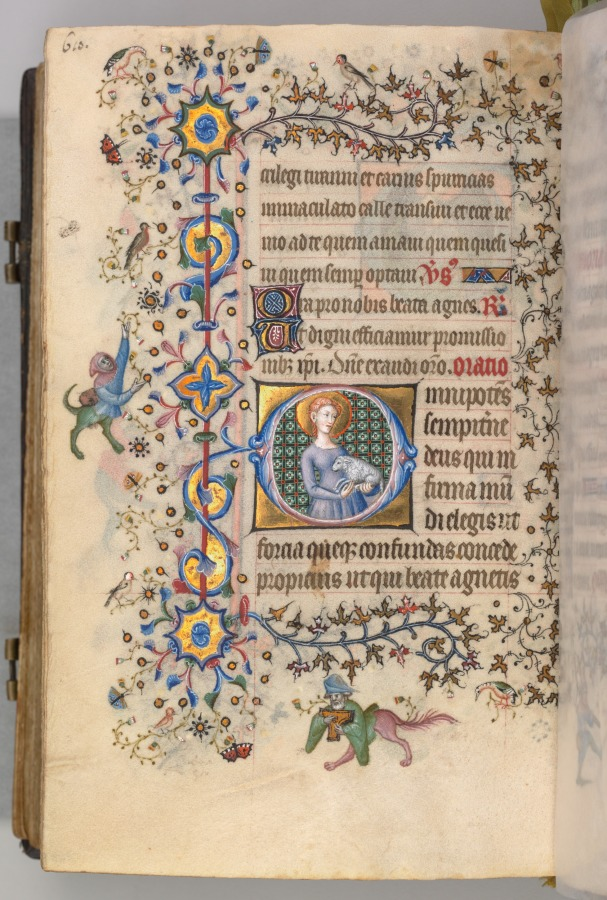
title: Hours of Charles the Noble, King of Navarre (1361-1425): fol. 299v, St. Agnes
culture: France, Paris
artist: Master of the Brussels Initials and Associates (French)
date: c. 1405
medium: ink, tempera, and gold on vellum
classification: Bound Volume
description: This precious volume was obviously highly prized by its owner, the French-born King of Navarre, who had his coat of arms painted on no less than twenty folios. Rather than directly commissioning this manuscript from a specific workshop, it seems that Charles the Noble acquired his book of hours -- perhaps ready-made for the luxury market -- while on a trip to Paris in 1404-05. A collaborative effort, six painting styles are evidenced within the pages of this codex, those of two Italians, two Frenchmen, and two Netherlanders. The painter who was responsible for the planning and decoration of the book, and who produced seventeen of the large miniatures, was a Bolognese artist known as the Master of the Brussels Initials. His principal assistant, responsible for most of the borders, was a Florentine who signed his name "Zecho" da Firenze on folio 208 verso.